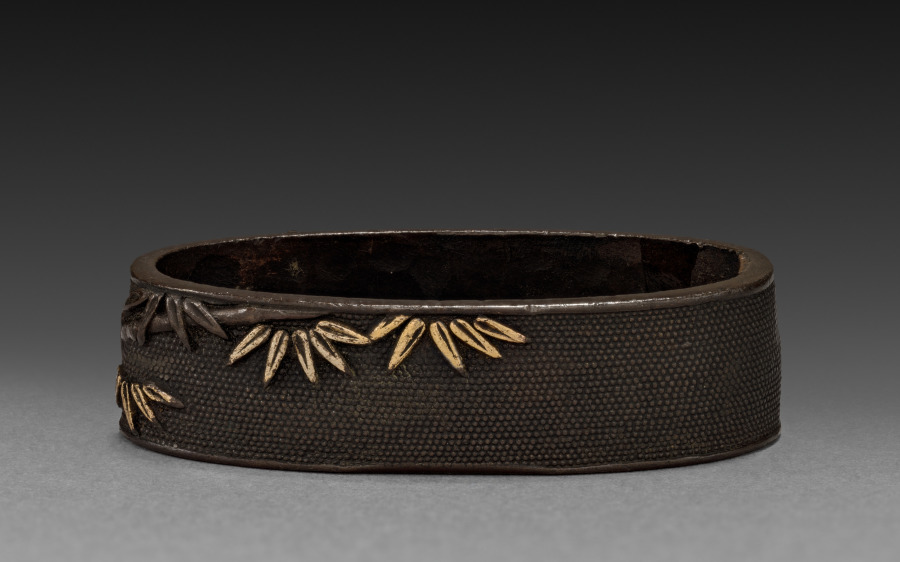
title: Sword-Hilt Collar (Fuchi) with Tiger in Bamboo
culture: Japan, Edo period (1615–1868)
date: 1700–1850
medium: shakudo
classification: Arms and Armor